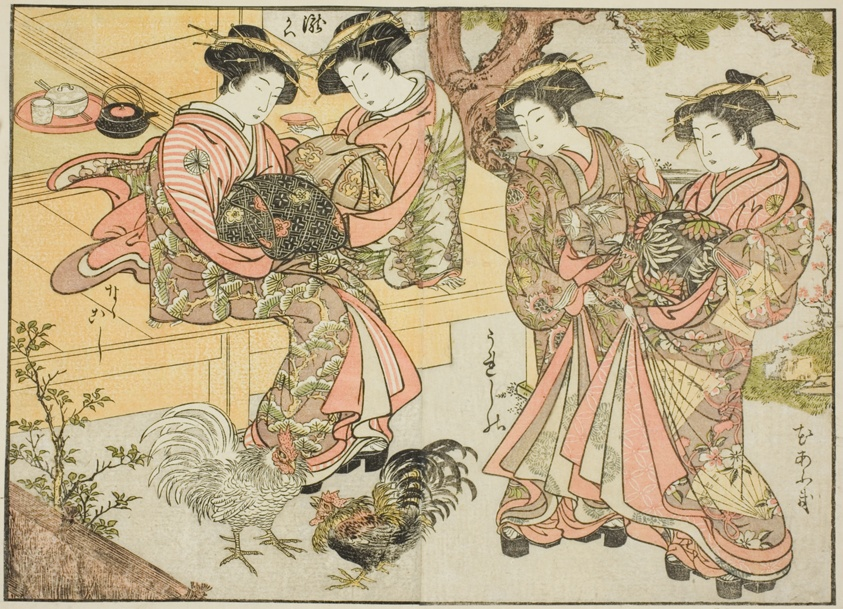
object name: Print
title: Courtesans of the Ogiya, from the book "Mirror of Beautiful Women of the Pleasure Quarters (Seiro bijin awase sugata kagami)," vol. 1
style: Japanese (culture or style)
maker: Katsukawa Shunsho; Japanese, 1726-1792; Kitao Shigemasa; Japanese, 1739-1820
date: 1776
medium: Color woodblock print; double-page illustration cut from a book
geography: Japan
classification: woodblock print; print; asian art